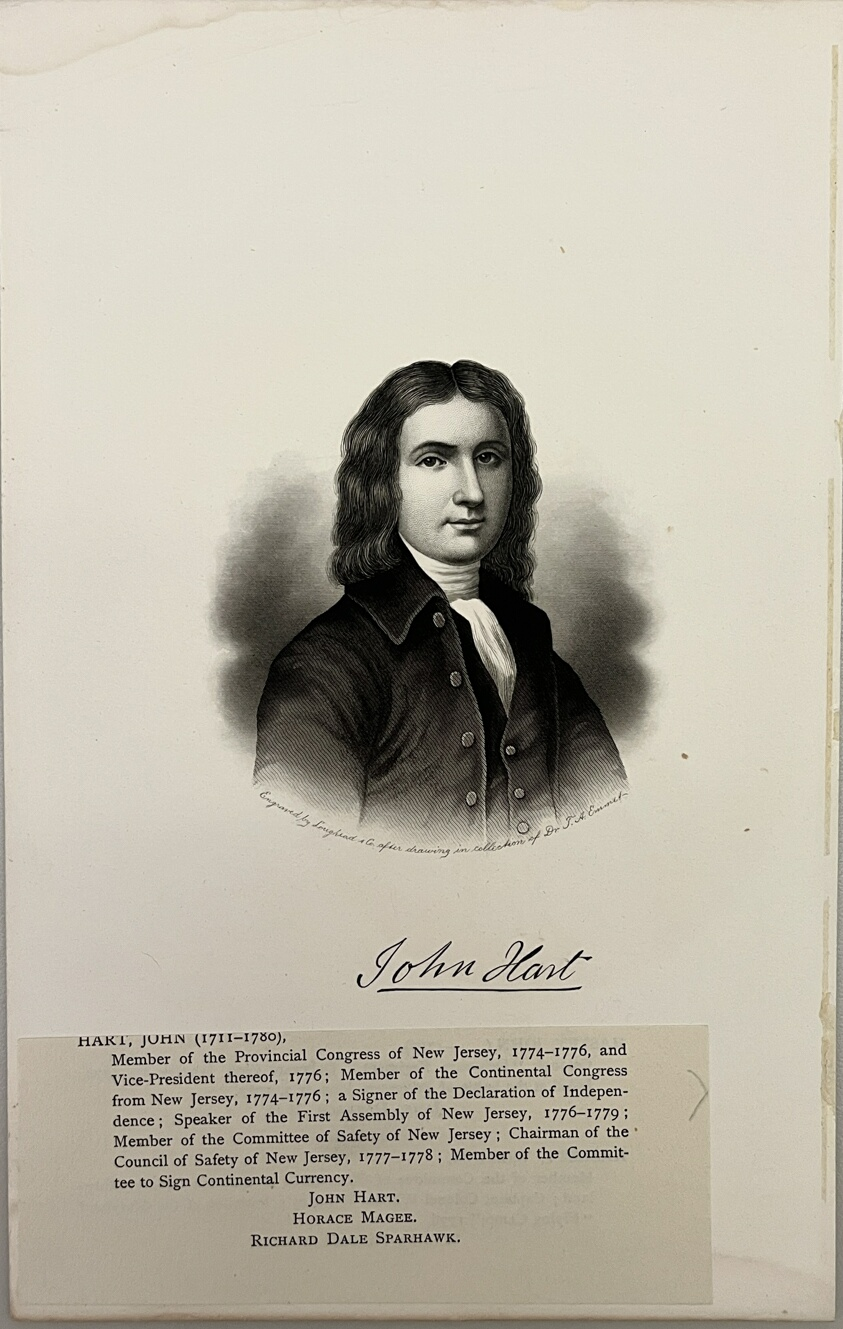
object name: Print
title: John Hart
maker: Artist Unknown (Likely American, 19th century)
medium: Etching on paper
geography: United States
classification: reproduction; print; prints and drawing